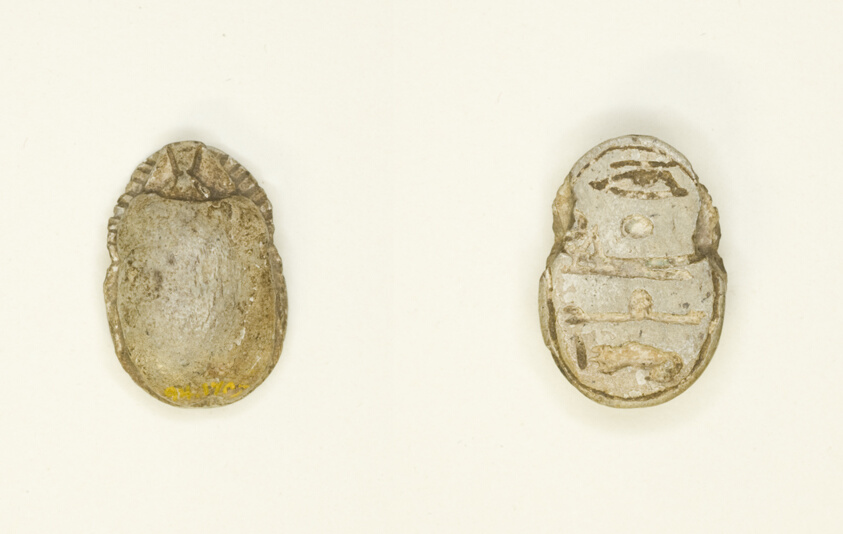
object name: Costume and Accessories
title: Scarab: Wish Formula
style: egyptian, ancient, late period (egyptian), new kingdom, third intermediate period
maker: Egyptian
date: New Kingdom–Late Period, Dynasties 18–26 (about 1550–525 BCE)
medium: Steatite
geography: Egypt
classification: scarab; ancient art; costume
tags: Hieroglyphs, boats, eyes, gods (deities), insects, sun, suns